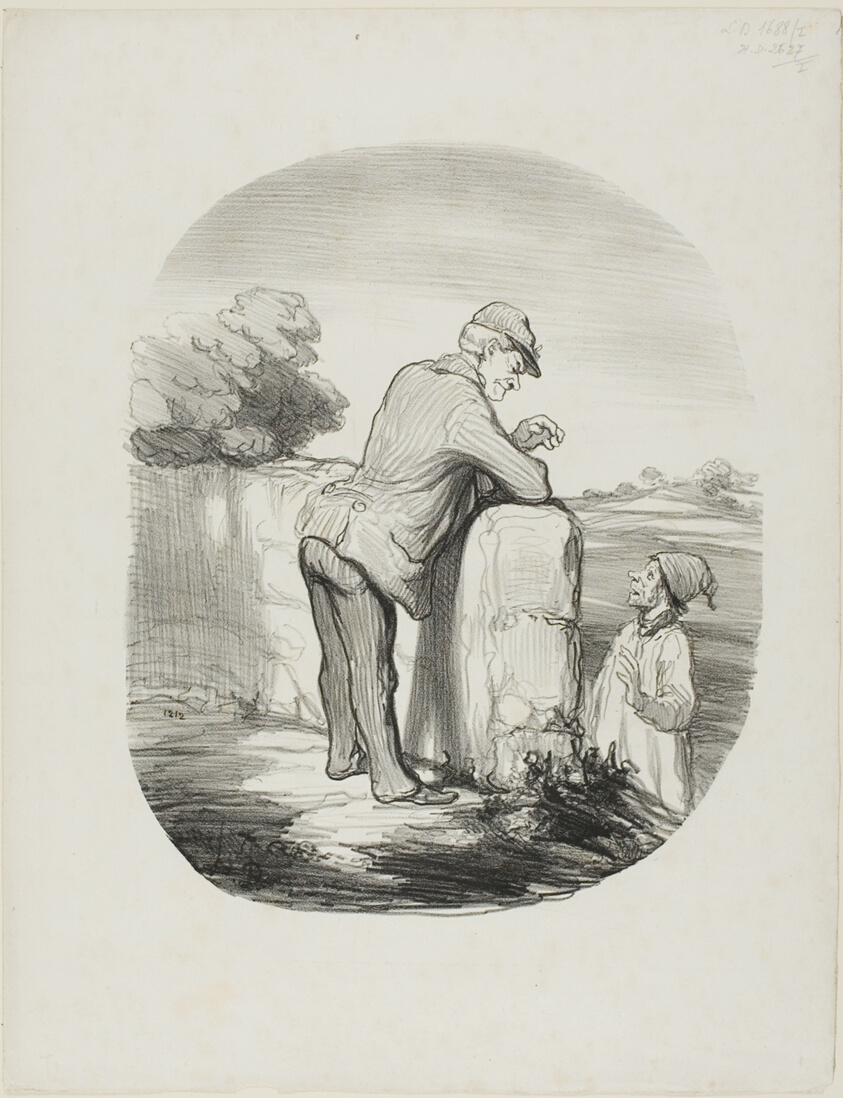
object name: Print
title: “- Tell me, mayor, what are communists? - You know, Pierre, communists are people who want to have everything in common with every Frenchman: the money, the work, and the land. - Well, in my opinion there is one thing they seem to be lacking: common sense,” plate 42 from Tout Ce Qu'on Voudra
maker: Honoré Victorin Daumier; French, 1808-1879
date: 1848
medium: Lithograph in black on white wove paper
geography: France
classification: lithograph; print; prints and drawing